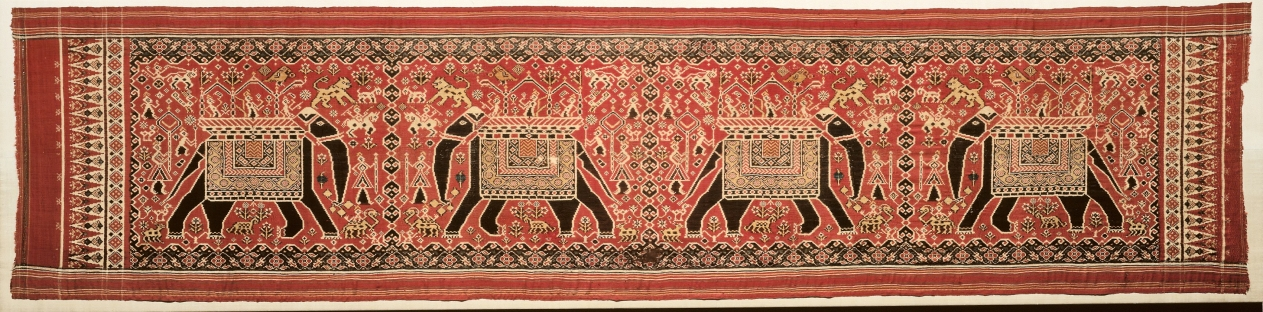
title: Patolu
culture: India, Gujarat, 19th century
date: 19th century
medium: tabby weave, double ikat; silk and cotton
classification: Textile